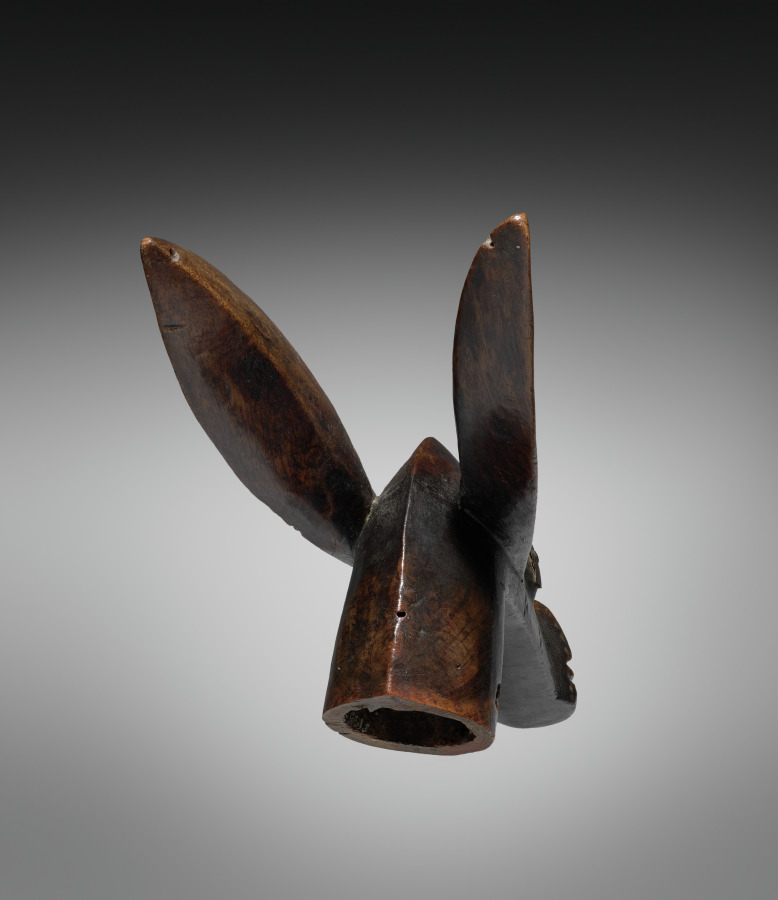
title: Head of a Hobbyhorse (korèdugaso)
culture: Africa, West Africa, Mali, Bamana blacksmith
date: late 1800s–early 1900s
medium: Wood and iron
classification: Sculpture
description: Pertaining to the male initiation society called Korè, this sculpture from the Koulikoro region represents the head of an aardvark and is part of a wooden hobbyhorse that is mounted by a ritual buffoon. The Korè initiates are divided into different classes, each having a designated mask. The ritual buffoons appear in pantomimes on different public occasions and poke fun at village authorities and other high-ranking individuals.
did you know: This is one of the best-known examples of a korèdugaso. It was featured on the catalogue cover for a 1935 exhibition at the Museum of Modern Art, one of the first on African arts in the US. It traveled to the CMA that same year.